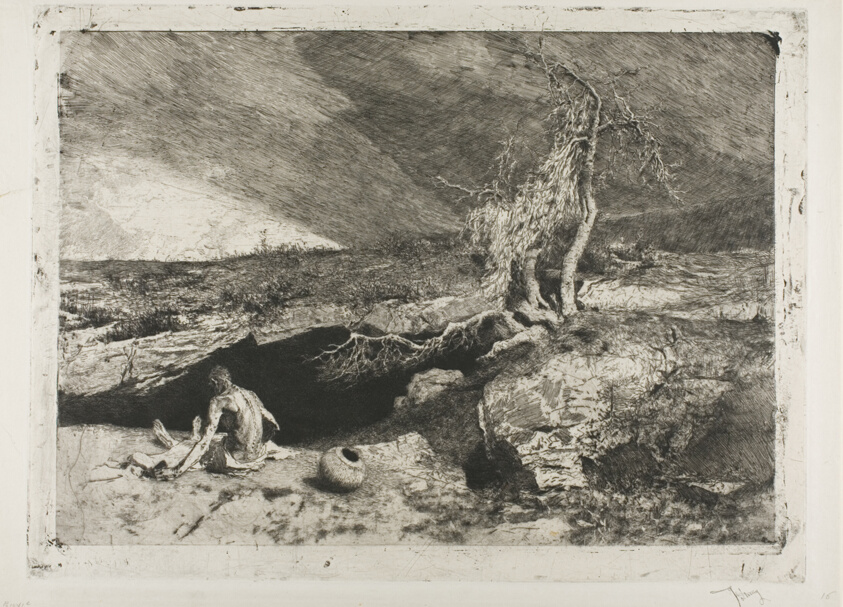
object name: Print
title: The Anchorite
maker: Mariano José María Bernardo Fortuny y Carbó; Spanish, 1838-1874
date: 1869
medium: Etching, aquatint, and drypoint on paper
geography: Spain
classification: etching; print; prints and drawing